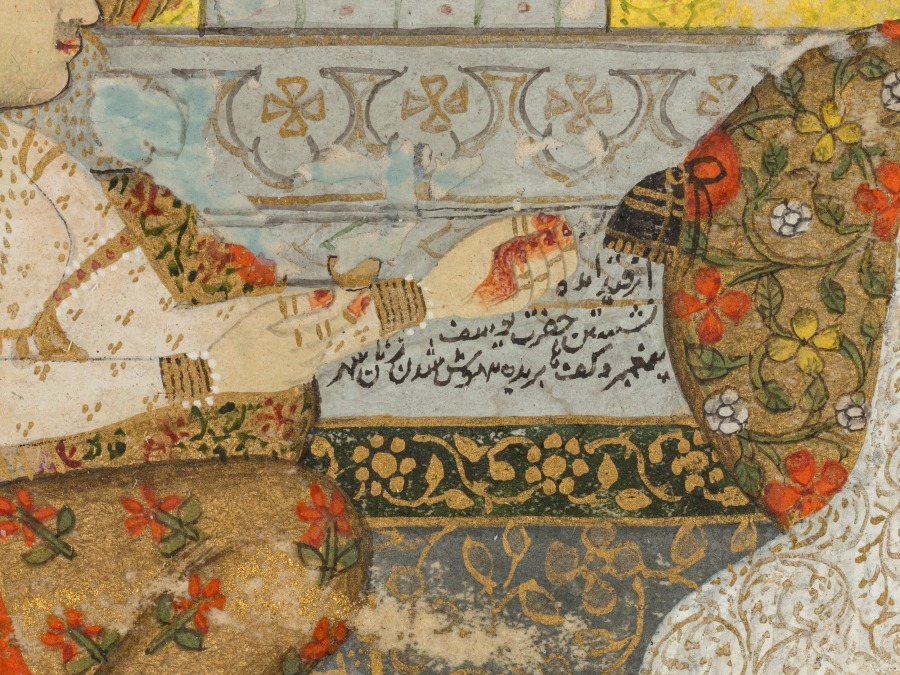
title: Lovers and beloveds: A composite of scenes from Persian, Urdu, and Sanskrit literature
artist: Chitarman II (Indian, c. 1680–с. 1750)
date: c. 1735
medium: Gum tempera and gold on paper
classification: Painting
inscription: Persian inscriptions throughout, in nasta‘liq script: Top left: The celebrated lover Ranjha; Top right, above awning: The notable ladies of the city falling into a swoon having caught sight of Joseph’s beauteous countenance; Top center, on pillar beneath canopy: The celebrated lover Vamiq; On another pillar, behind the woman’s head: The celebrated beloved ‘Azra; Upper left, on pillar: King Nala, the lover; Central figure with halo: The coming from the prison and sitting [in state] of the Lord Joseph the Prophet, with the women of the town cutting the palms of their hands and falling down unconscious; Left of center: [. . . cutting palms . . . wine cups fell from their hands . . . state of wonderment . . .]; Central pavilion at left: Sassi, the beloved the lover [Punnun]; Below central figure of Joseph: The stream of milk Shirin the beloved, weeping The death of Farhad, the lover; Lower right, in front of bearded man: Hafiz of Shiraz; Below his decanter: The stick of candy [referring to the woman with whom, according to popular lore, Hafiz was supposed to have fallen in love as a youth]; Behind the pavilion at right: Bride descending into a grave . . .; On the white railing to the left: Khwaja Bu Ali . . .; Bottom left: Queen Padmavati, the beloved, King Ratnasena, the lover; Bottom right: Majnun, the lover; On page held by Majnun: Say, “He is Allah, who is One, Allah the eternal refuge. He neither begets nor is born, Nor is there to Him any equivalent.” [Qur'an, chapter 112]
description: The figure of Joseph, identified by his halo, sits in the center near the top of this painting of heroes and heroines of ten different Persian, Urdu, and Sanskrit romances. The depicted scene occurs after Joseph has been purchased by Zulaykha in Egypt. Zulaykha, wishing to show him off to her friends and acquaintances, invites them to her home where she supplies oranges and knives. When the women see Joseph, they all are so distracted by his divine beauty that they accidentally cut their hands while peeling their oranges, but remain mesmerized by his appearance. The dramatic scene in the center is from the Persian romance of Khusrau and Shirin, in which Farhad, a stonecutter who loved Shirin, threw himself to his death from a mountaintop after hearing news of Shirin’s death, falsely sent to him from his rival Khusrau. The emaciated Majnun is in the lower right corner. Every vignette has been identified with a tiny Persian inscription.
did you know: Below the bearded poet Hafiz is the woman he loved; her name was Stick of Candy.